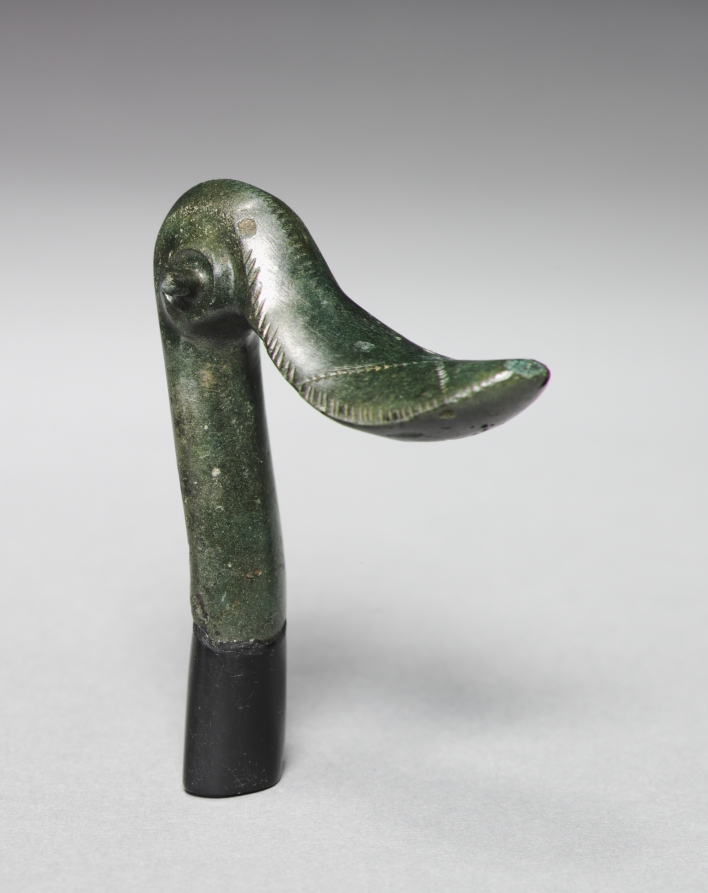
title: Duck Head Finial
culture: possibly Hungary, Bronze Age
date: c. 1400–1300 BCE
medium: bronze, cast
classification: Sculpture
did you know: A decorative object, this duck head finial likely topped a piece of furniture.